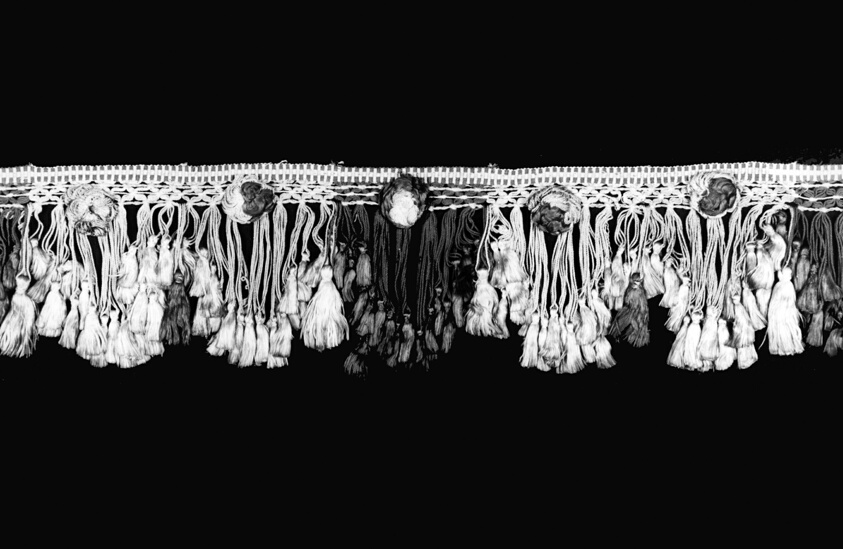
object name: Textile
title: Fringe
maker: France or Italy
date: 17th/18th century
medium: Silk, warp-striped, warp-faced plain weave with extended ground weft loop fringe; grouped and knotted; with attached loop and cut fringe tassels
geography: Italy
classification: textile; weaving